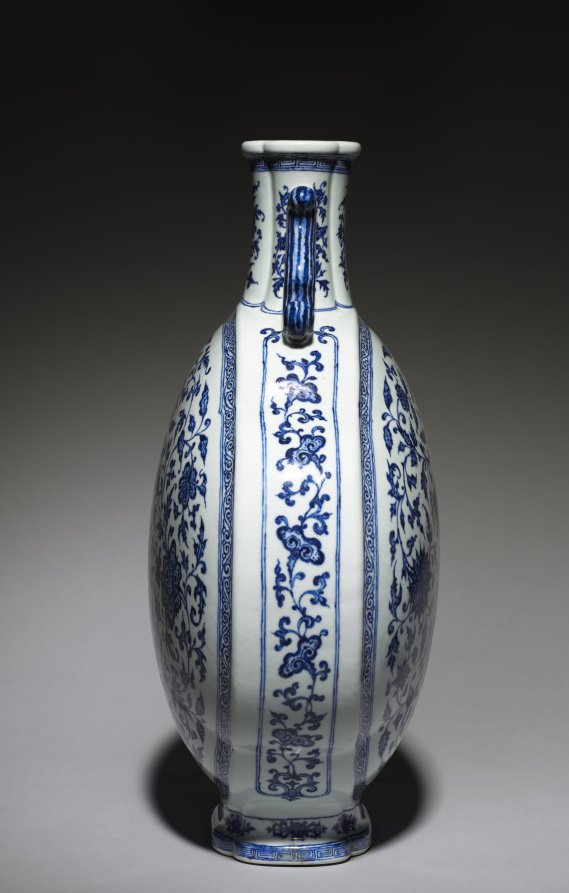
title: Gourd Flask with Floral Scrolls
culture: China, Jiangxi Province, Jingdezhen, Qing dynasty (1644–1911), Yongzheng mark and period (1723–35)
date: 1723–35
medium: porcelain with underglaze blue decoration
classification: Ceramic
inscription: Yongzheng mark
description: This large blue-and-white pilgrim–shaped vase was fashioned from fine kaolinic porcelain at the imperial kilns at Jingdezhen, Jiangxi province. The body of the vase is of quatrefoil shape merging into a highly similar shaped neck, flanked by two scroll handles. The base is of oval quatrefoil form. The vase is decorated with lotus and other flowers, leaves, and scrolling tendrils in brilliant underglaze cobalt blue beneath a pellucid glaze. The underfoot bears an imperial mark.